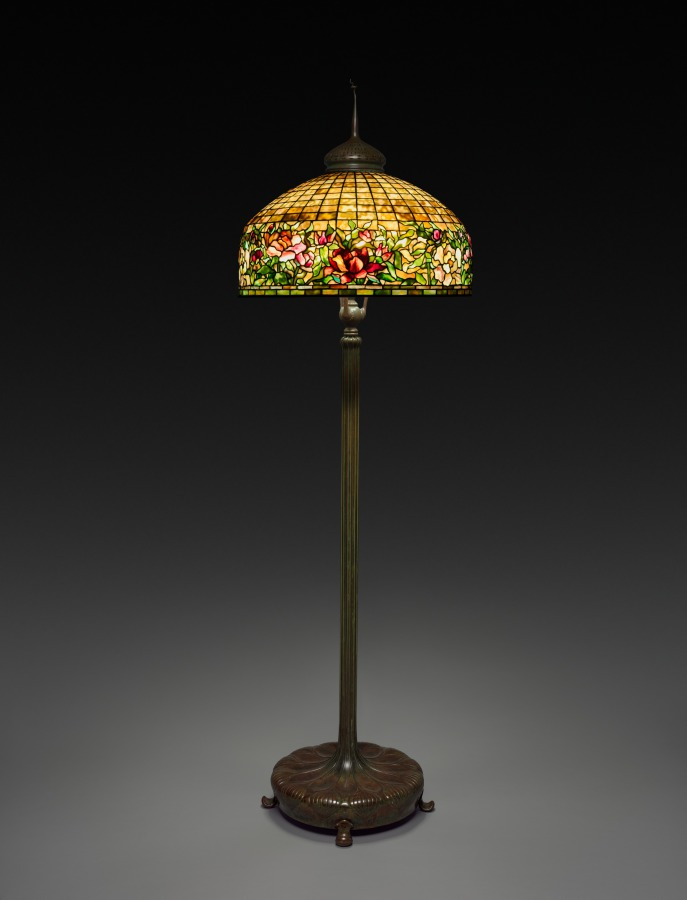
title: Peony Border Floor Lamp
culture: America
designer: probably by Clara Wolcott Driscoll (American, 1861–1944)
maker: Tiffany Studios (United States, New York, 1902–32)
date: c. 1905–10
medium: leaded glass, bronze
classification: Lamp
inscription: Shade impressed: TIFFANY STUDIOS NEW YORK 1574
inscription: Base impressed: TIFFANY STUDIOS/NEW YORK/376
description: In the 1870s a renewed emphasis on natural landscapes ushered in a generation of cottage gardeners who delighted in planting perennials in large quantities. Louis Comfort Tiffany was among those who championed the lush, sometimes wild-looking displays of varied floral species in the garden at his Long Island estate, Laurelton Hall. Tiffany encouraged his designers to take inspiration from his garden by shipping fresh cuttings almost weekly to his studios. Ohio native Clara Wolcott Driscoll and her team of female designers created floral patterns for lamps and mosaics based on the colorful blooms of spring that became among the most sought after and commercially successful of Tiffany’s production.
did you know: Standing floor models of this size were among the most expensive of Louis Comfort Tiffany's lamps.